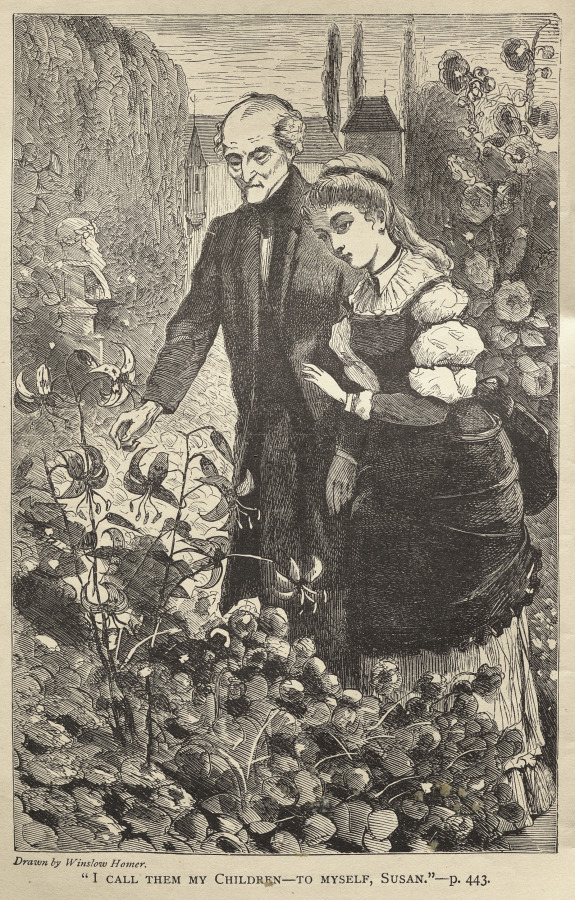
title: "I Call them my Children - To Myself, Susan."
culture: America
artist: Winslow Homer (American, 1836–1910)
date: 1869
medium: wood engraving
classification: Print